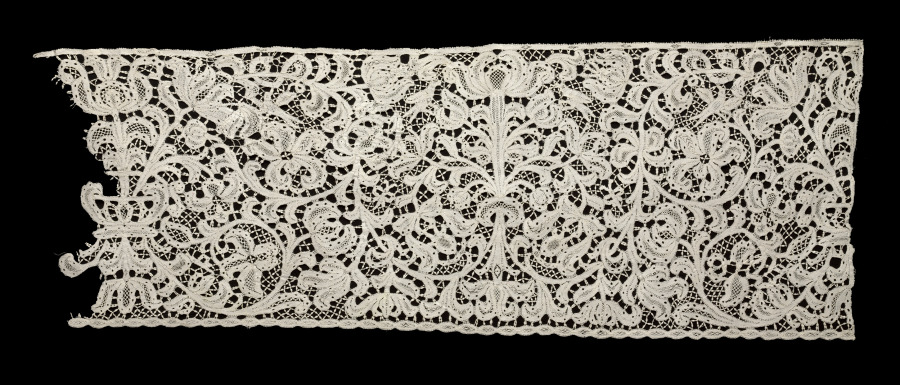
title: Fragment of Lace Flounce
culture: Italy, Milan(?) or Genoa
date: 1600s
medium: Bobbin lace (tape lace with bride ground)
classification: Lace